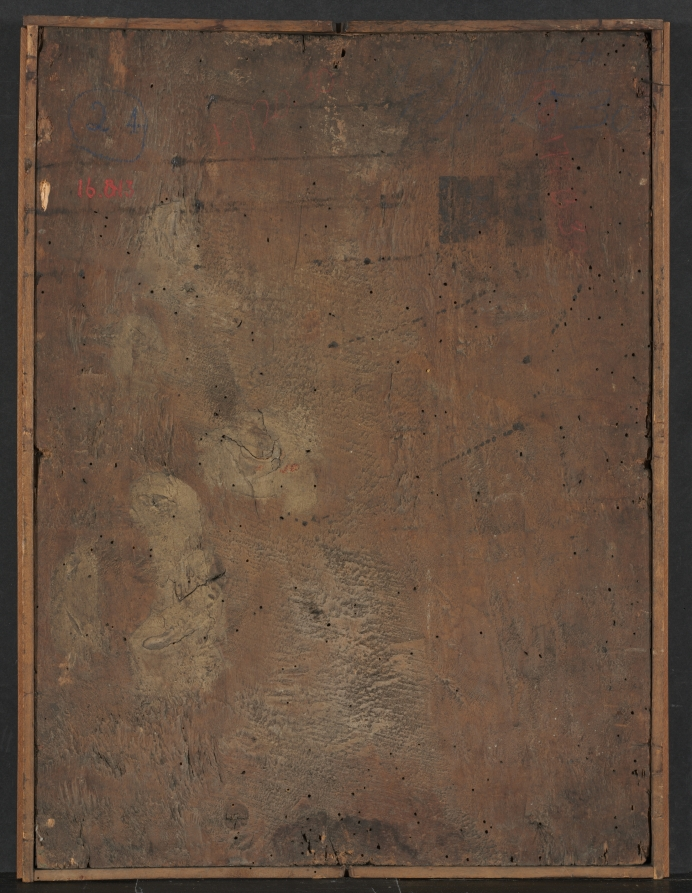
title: Madonna and Child in a Niche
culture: Italy, 16th century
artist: attributed to Antonio del Ceraiolo (Italian)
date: c. 1520s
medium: oil on wood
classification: Painting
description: This image of Madonna with the Christ Child on her lap has been extensively altered by restoration. During the Renaissance, it was important that the Christ Child's genitalia be exposed, for it declared that Christ is the humanization of God, that he experienced temptation, and that in his exposure, he was without shame. When it was repainted, a cloth was added to the image to cover the Christ Child's genitalia. In 1941 the removal of old overpaint returned the painting more closely to its original state.